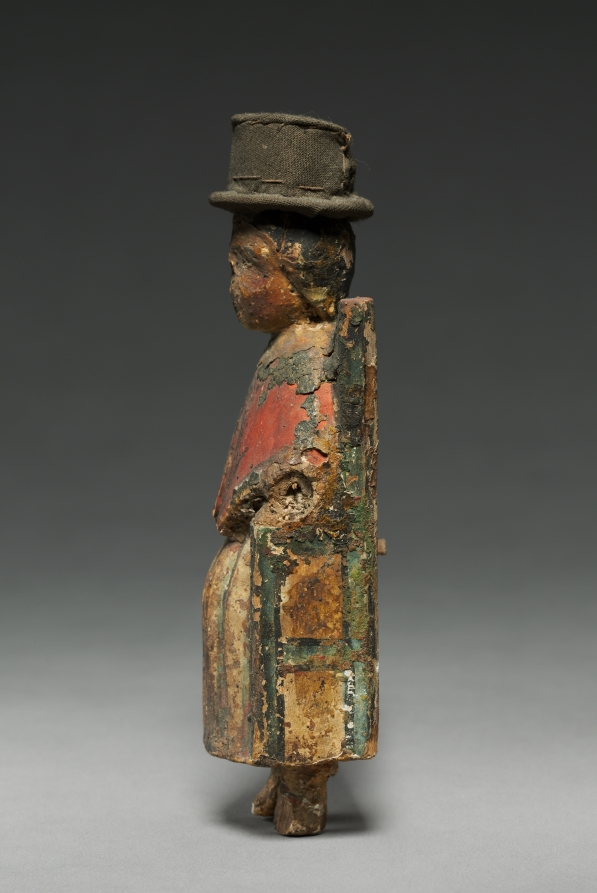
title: Christ Child: santo de bulto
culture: America, New Mexico, 17th-18th century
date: 1600s-1700s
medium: wood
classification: Sculpture